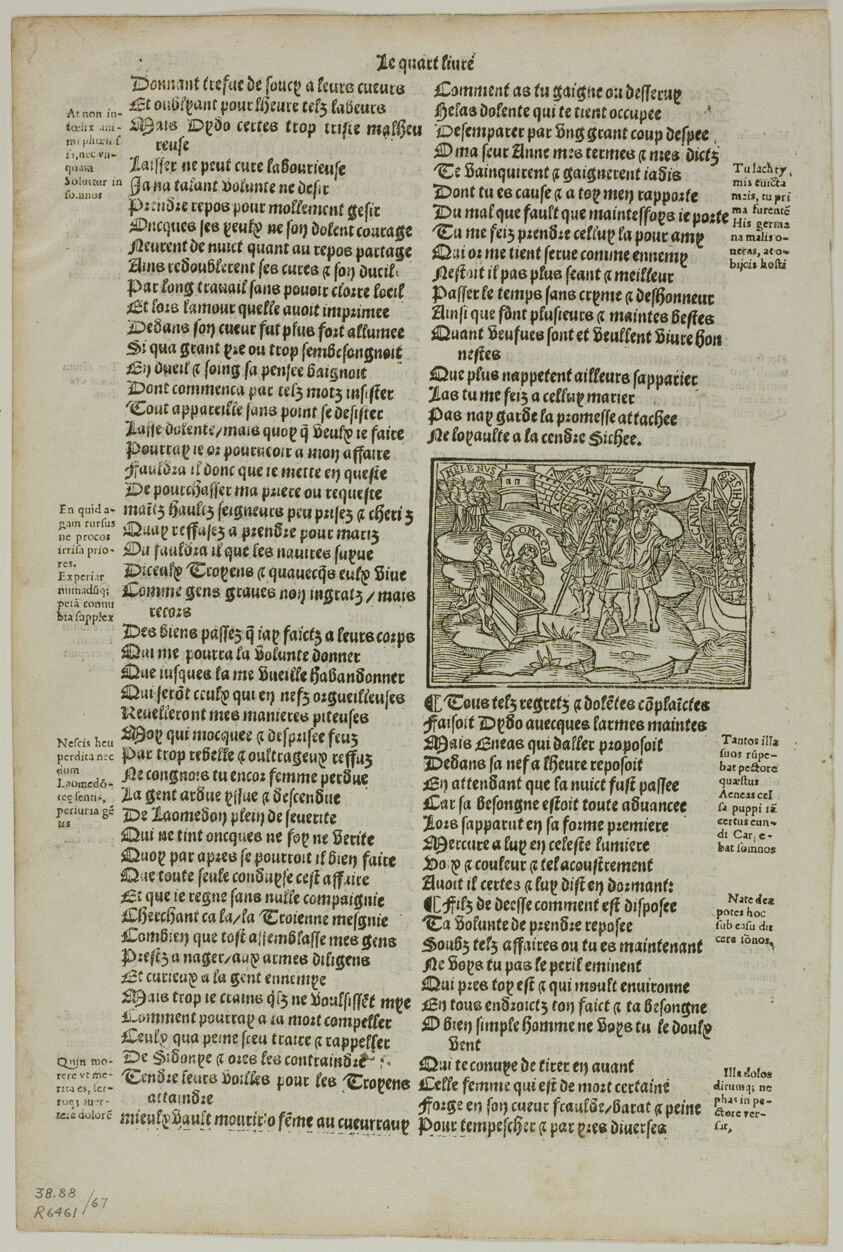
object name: Print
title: Illustration from Les Eneydes de Virgille, plate 67 from Woodcuts from Books of the XVI Century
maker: Unknown Artist (French, 16th century); assembled by Max Geisberg (Swiss, 1875-1943)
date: 1540, assembled into portfolio 1937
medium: Woodcut on paper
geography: France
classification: woodcut; print; prints and drawing